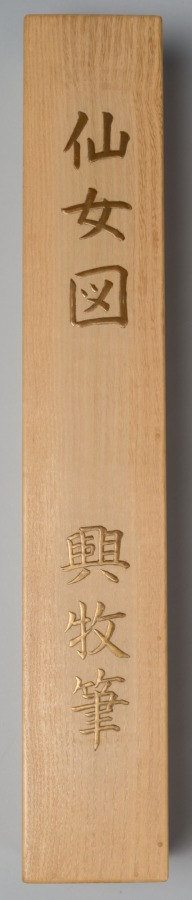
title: Female Daoist Figure in Landscape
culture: Japan, Muromachi period (1392–1573)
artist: Kōboku (Japanese)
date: early 1500s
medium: hanging scroll; ink on paper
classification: Painting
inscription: 「興牧」（朱文方印）